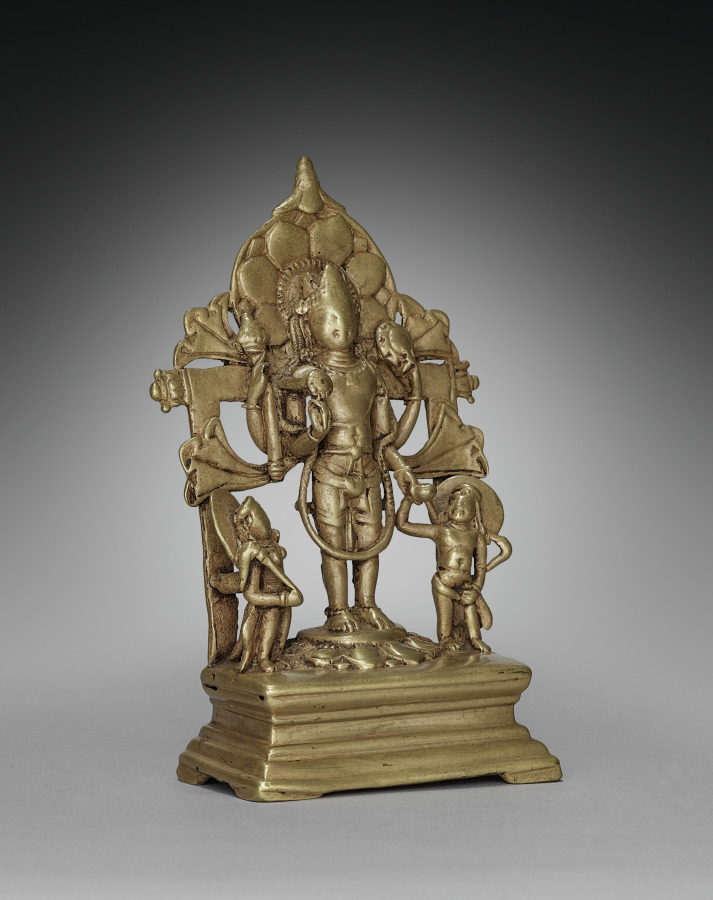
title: Standing Vishnu with Attendants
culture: India, Kashmir, 9th century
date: 800s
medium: brass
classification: Sculpture